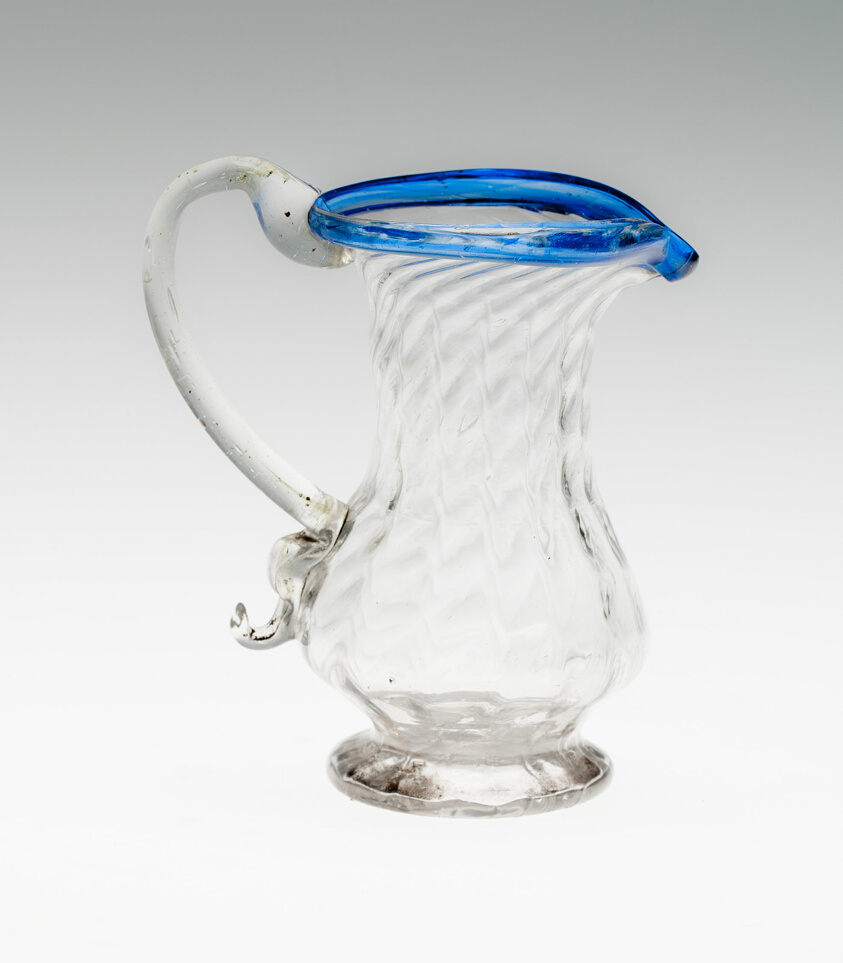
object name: Glass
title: Jug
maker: England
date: 17th to 18th century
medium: Glass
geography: England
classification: glass; european decorative arts